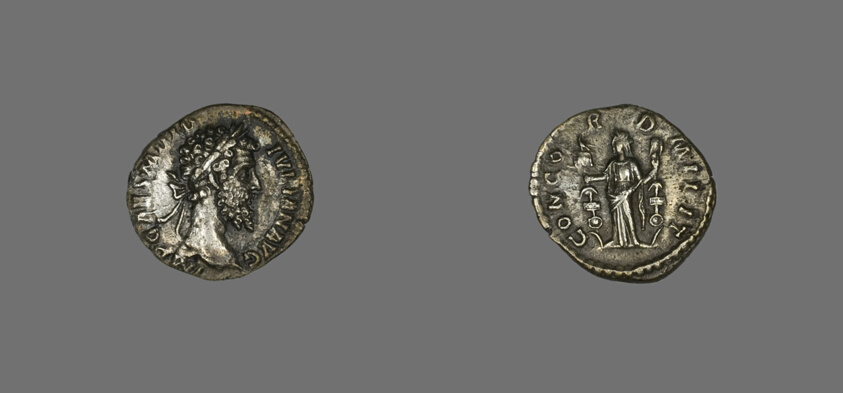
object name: Coin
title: Denarius (Coin) Portraying Didius Julianus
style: imperial (roman), roman (ancient, style or period)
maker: Roman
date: 193 (28 March to early June)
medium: Silver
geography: Rome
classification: coin; ancient art